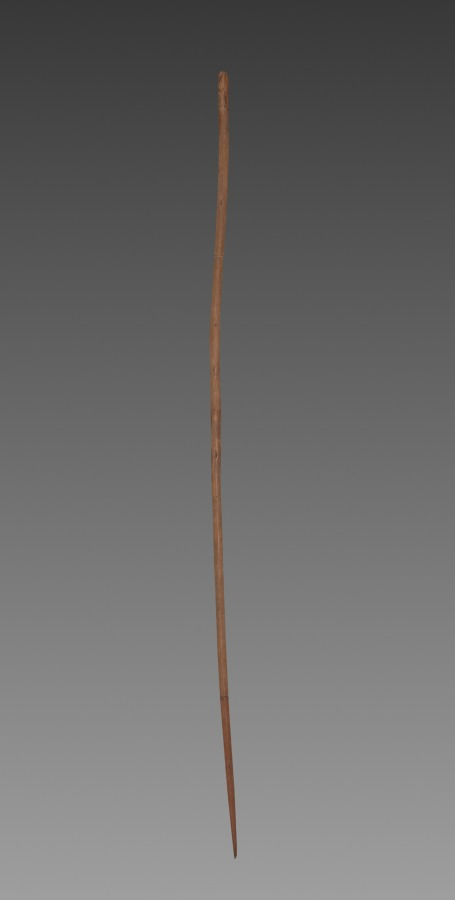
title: Arrow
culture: Egypt, First Intermediate period (2123–2040 BCE), Dynasty 10–Middle Kingdom (2040–1648 BCE), Dynasty 12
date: 2123–1914 BCE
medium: wood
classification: Wood